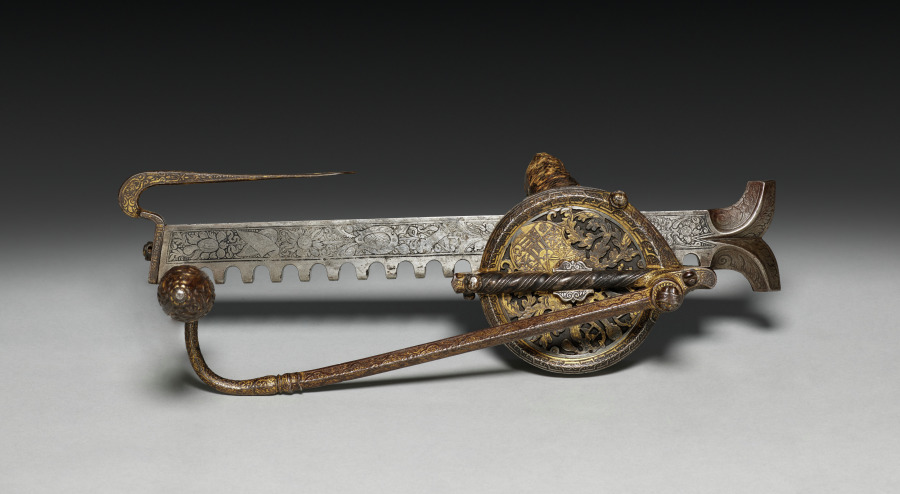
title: Cranequin with Arms of Elector Augustus I of Saxony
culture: Germany, Saxony, 16th century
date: c. 1553–73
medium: steel; etched, chased and gilded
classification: Arms and Armor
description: This winder or cranequin was for Prince Elector Augustus I, a member of the ruling elite in the Holy Roman Empire. Augustus, powerful and wealthy, had even the most practical instruments ornately decorated, including this cranequin.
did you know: Augustus was a marksman who took part in crossbow competitions. He had a large collection and often gave them to friends.